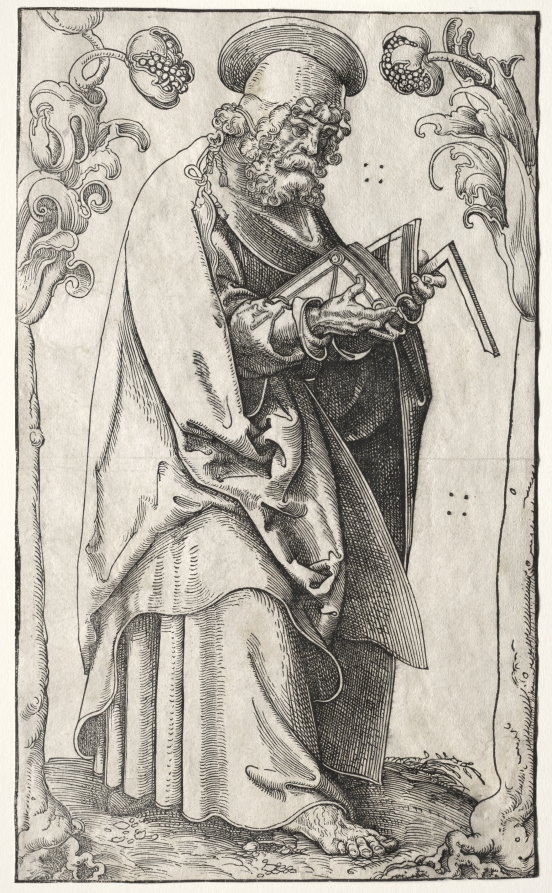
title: The Apostle Matthew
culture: Germany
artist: Lucas Cranach (German, 1472–1553)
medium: woodcut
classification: Print